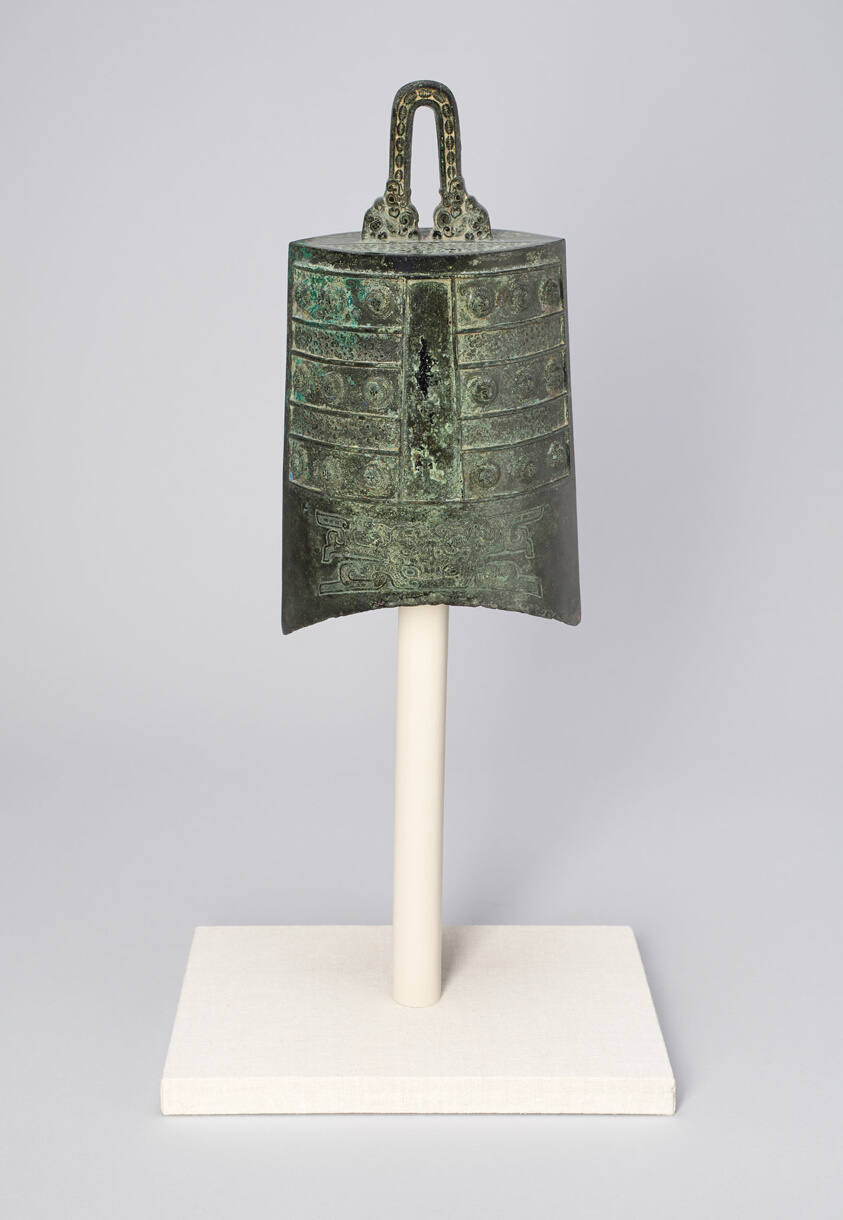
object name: Decorative Arts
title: Loop Suspension Bell (Niuzhong)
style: Chinese (culture or style)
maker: China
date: Eastern Zhou dynasty (770–256 B.C.), late 6th/early 5th century B.C.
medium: Bronze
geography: China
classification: bronze; asian art; decorative arts